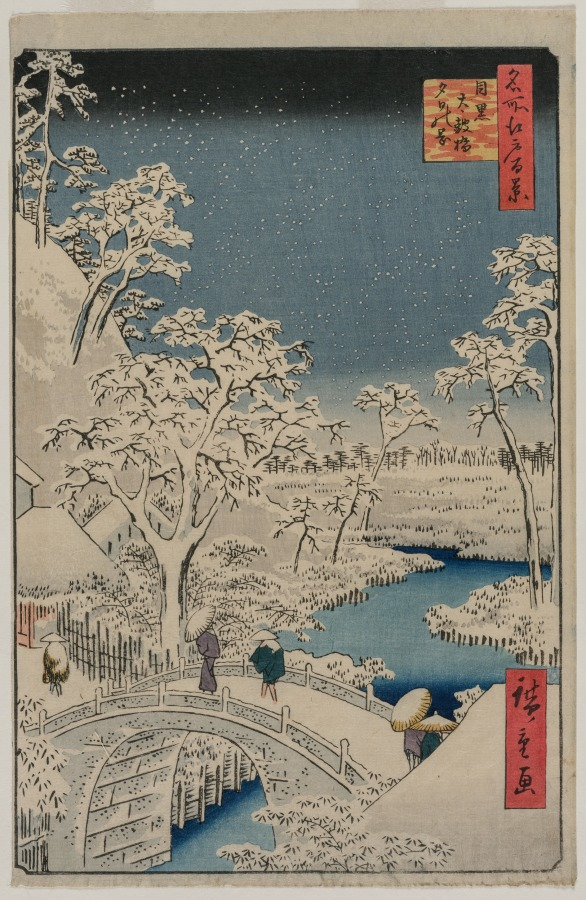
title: Meguro Drum Bridge and Sunset Hill, from One Hundred Views of Famous Places in Edo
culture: Japan, Edo period (1615–1868)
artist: Utagawa Hiroshige (Japanese, 1797–1858)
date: 1857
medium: color woodblock print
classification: Print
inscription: Signature: Hiroshige ga. Publisher: Uoya Eikichi (trimmed). Censorship Seal: aratame (trimmed).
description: The arched stone bridge over the Meguro River in Edo (now Tokyo) was known as the Drum Bridge for its resemblance to the rounded profile of a drum. This print shows people shielding themselves from the snow with hats and umbrellas as they cross it. In the foreground on the lower right, behind the artist’s signature, is the roof of a shop called Shōgatsu-ya that served shiruko mochi—a sweet red-bean soup with rice cakes that is a winter treat. Sunset Hill lies on the other side of the bridge and was once known for its red maple leaves in autumn.